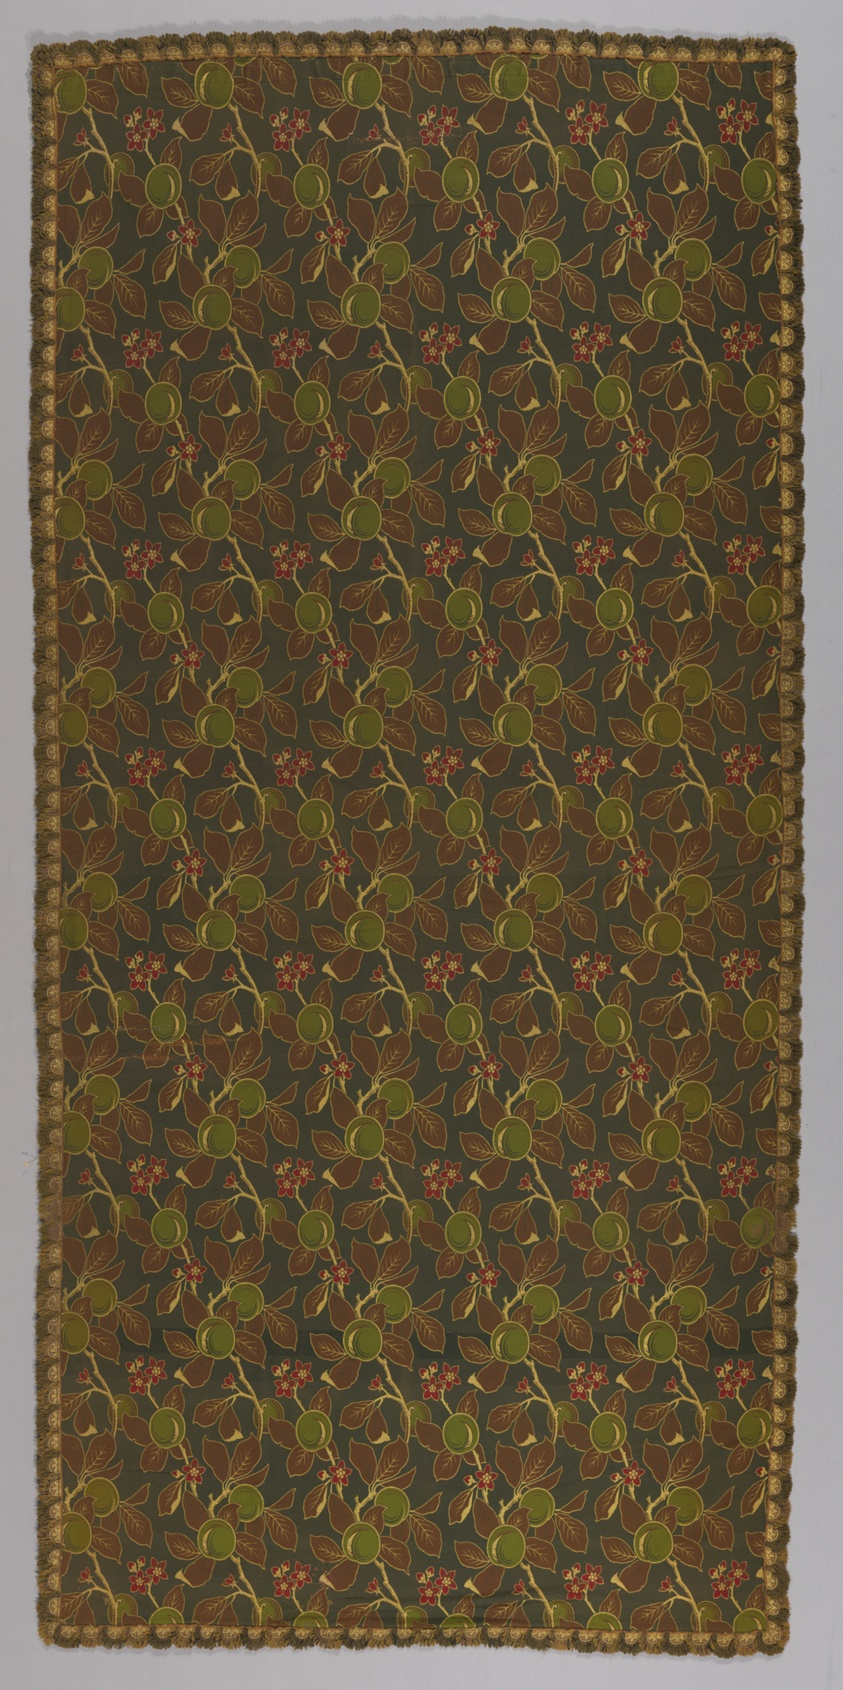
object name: Coverings and Hangings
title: Lined Curtain Panel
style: Arts and Crafts Movement, british, British Arts and Crafts Movement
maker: Design attributed to Bruce James Talbert (English, 1838-1881); Possibly manufactured by J. W. & C. Ward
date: Late 19th century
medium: Woven wool; cotton lining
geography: England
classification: weaving; textile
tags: foliage, floral motifs, flowers, fruit